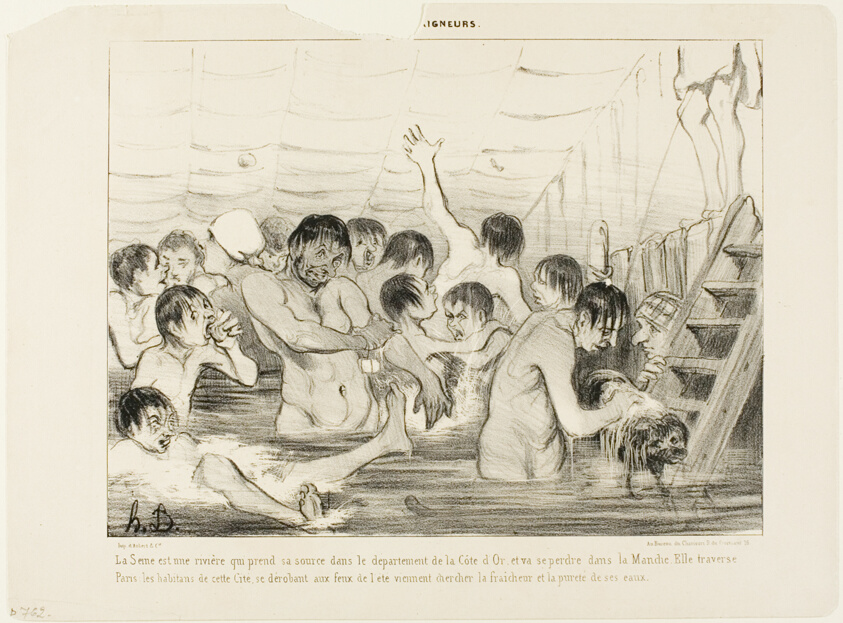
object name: Print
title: The source of the Seine is the Cote d'Or, and it empties into the Channel. On its way it traverses Paris where the inhabitants escape the summer's heat and try to find freshness and purity in this river, plate 3 from Les Baigneurs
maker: Honoré Victorin Daumier; French, 1808-1879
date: 1839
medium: Lithograph in black on ivory wove paper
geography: France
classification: lithograph; print; prints and drawing